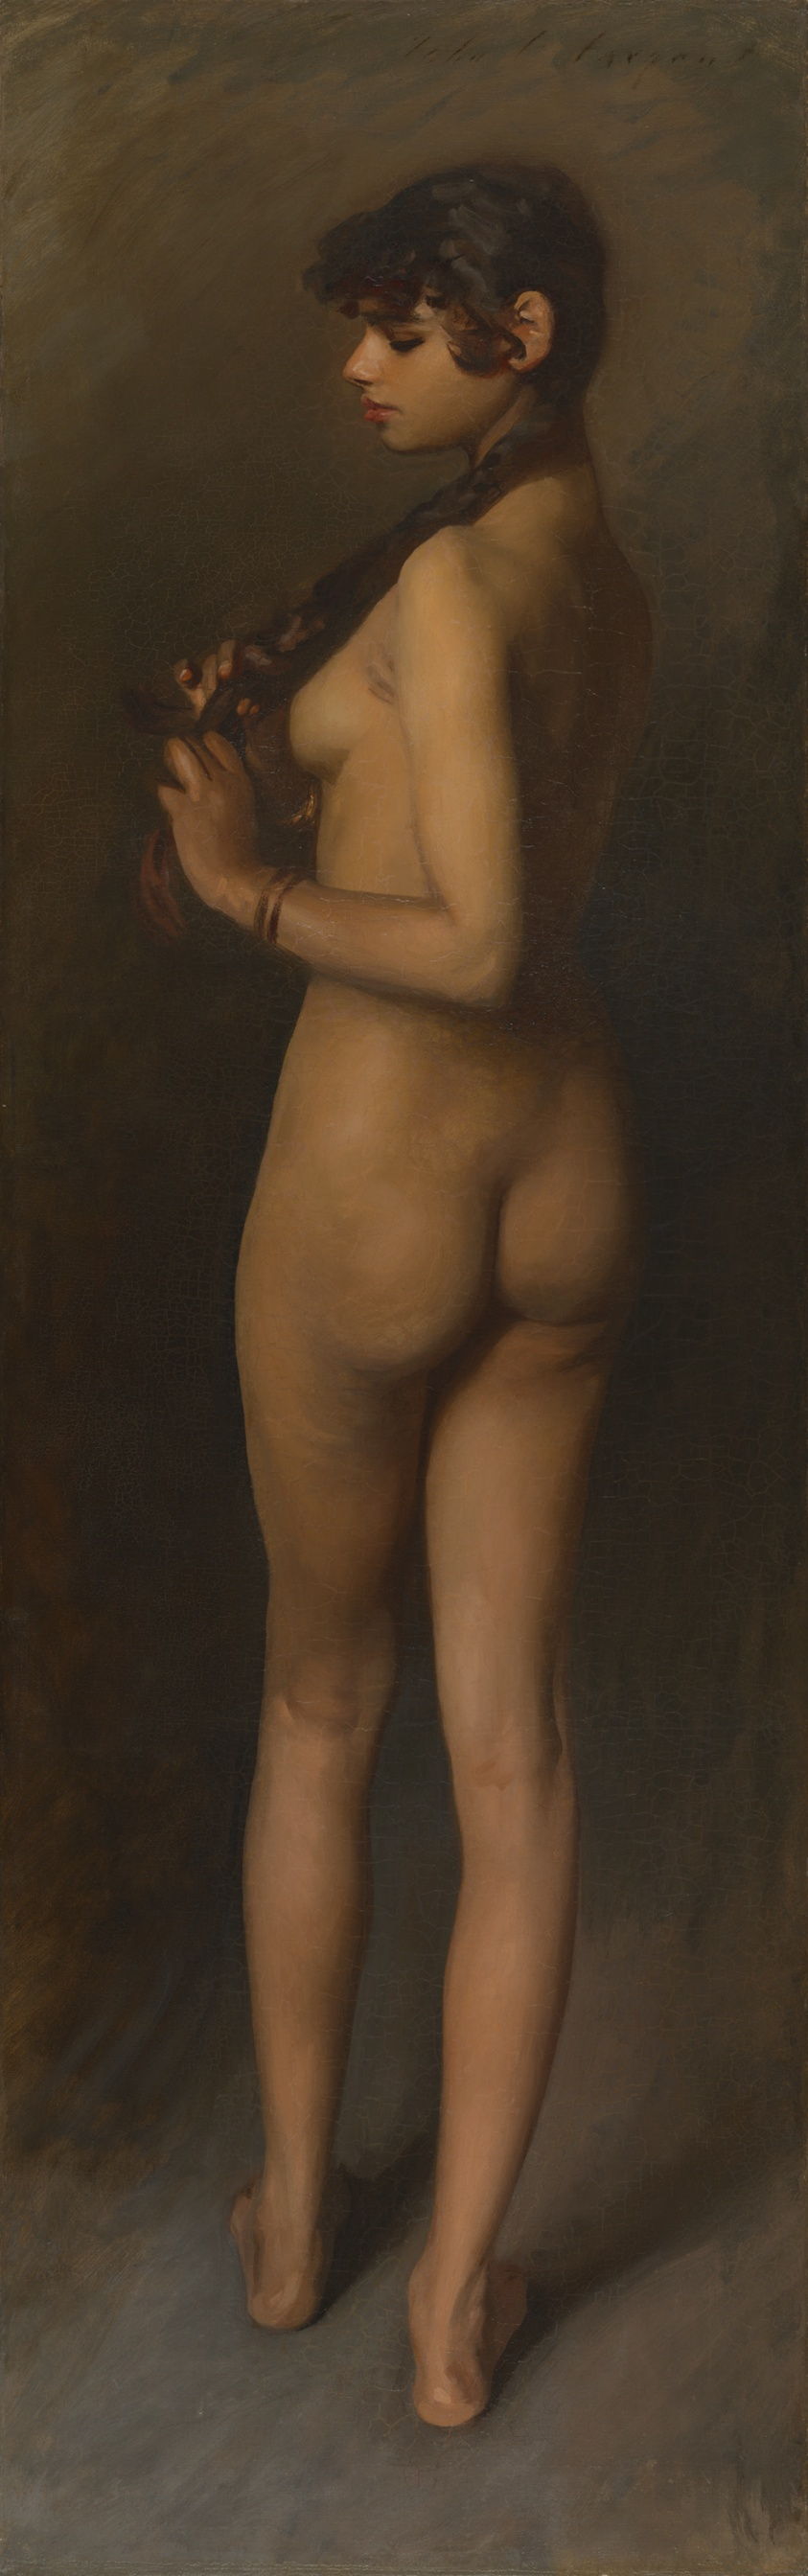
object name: Painting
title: Life Study (Study of an Egyptian Girl)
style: Realism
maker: John Singer Sargent (American, 1856–1925)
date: 1891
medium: Oil on canvas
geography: Egypt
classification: painting; american arts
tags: Chicago